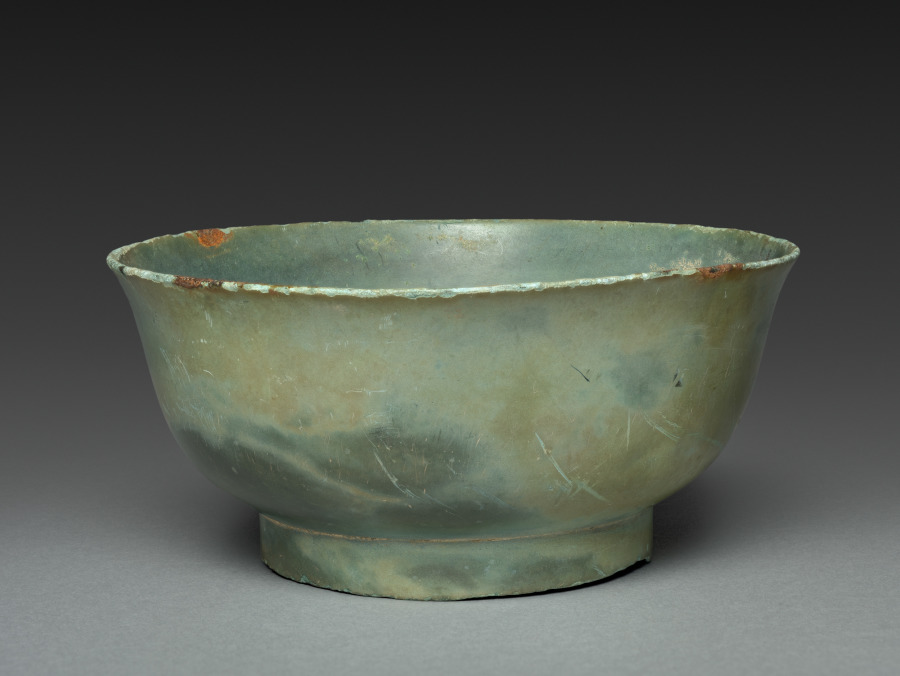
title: Bowl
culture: Korea, Joseon dynasty (1392–1910)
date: 1700s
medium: bronze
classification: Metalwork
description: In ancestor veneration rituals, deceased parents or ancestors are sanctified as spirits who are believed to oversee their descendants. Three times a year, once at the lunar new year, once at the person’s death date, and once at the time of the mid-autumn festival, food would be placed on the table for the ancestors, including fruits, rice, meat, and rice wine. During these ceremonies the worshippers’ attitude was as reverential toward the objects meant to embody the ancestors’ spirits as that toward a living parent. This cup may have been used for ancestral rituals to contain rice wine.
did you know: This bronze bowl may have been used in family rituals such as ancestral worship ceremonies in the Joseon period.